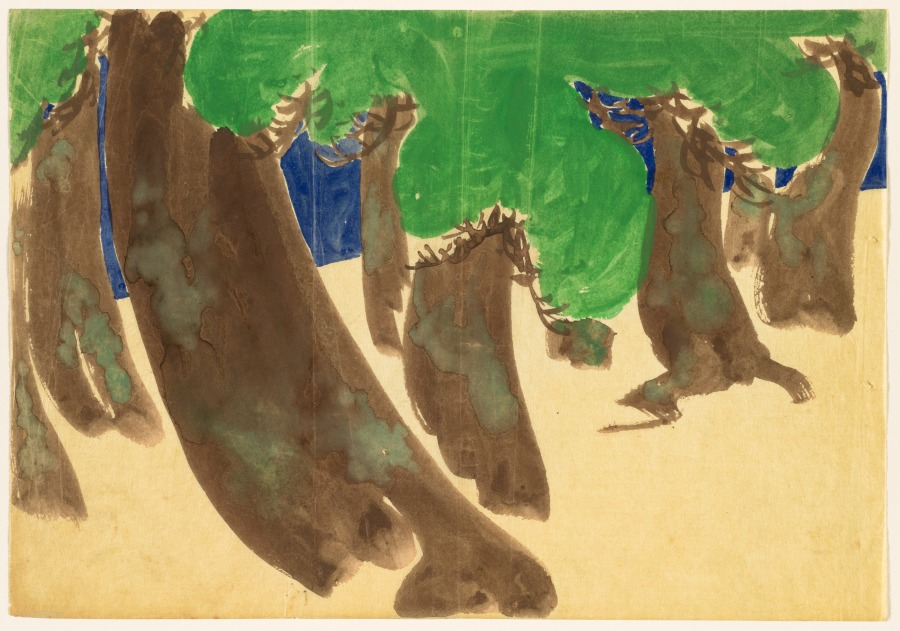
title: Flowers of a Hundred Worlds (Momoyogusa): Windswept Pines (Sonarematsu)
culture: Japan, Meiji period (1868–1912)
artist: Kamisaka Sekka (Japanese, 1866–1942)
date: 1909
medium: ink and color on paper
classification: Drawing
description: Kamisaka Sekka made preparatory drawings for his Flowers of a Hundred Worlds series on tracing paper with ink and color. The freehand sketches are much looser than the finished, printed compositions.